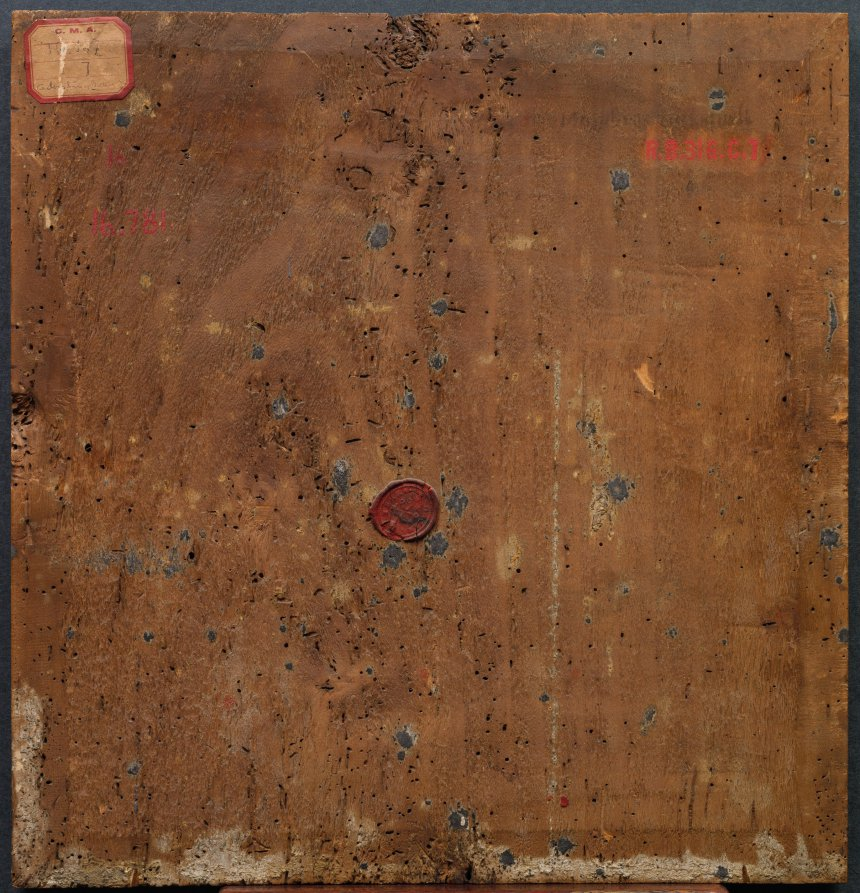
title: Adoration of the Shepherds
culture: Italy, 15th century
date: c. 1480–1500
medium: oil on wood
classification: Painting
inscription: annotated lower right: MASOLINUS